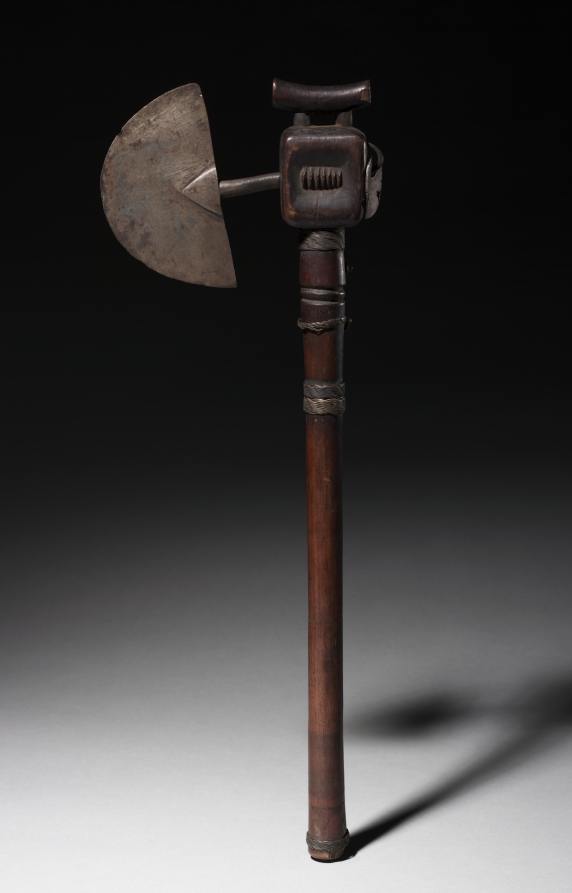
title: Ceremonial Axe (gano)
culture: Southern Africa, Zimbabwe, Shona-style blacksmith-carver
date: 1900s, by 1928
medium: Iron, wood, and metal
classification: Arms and Armor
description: This ceremonial axe (gano) showcases its maker’s skill in using different materials. The crescent-shaped blade was likely locally forged; braided wires and a Swiss pocket watch fragment on the handle were imported. Like the headrest nearby, gano were gendered female; a small headrest is carved at top. Too fine for battle, a man may have held it as a status or ancestral symbol during rituals or dancing. Though made for centuries, religious use of knives and axes waned due to early 20th-century Christianity and government laws. Rising independence-era Zimbabwean nationalism (1960s–70s) revived tradition-based religion and associated objects like the gano.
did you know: This ceremonial axe has a half-moon piece of metal nailed to it, marked "EKB Depose." It is part of the mechanism for a pocket watch made by Edward Kummer of Bettlach, whose Swiss factories marked watches with his initials between 1888 and 1932.